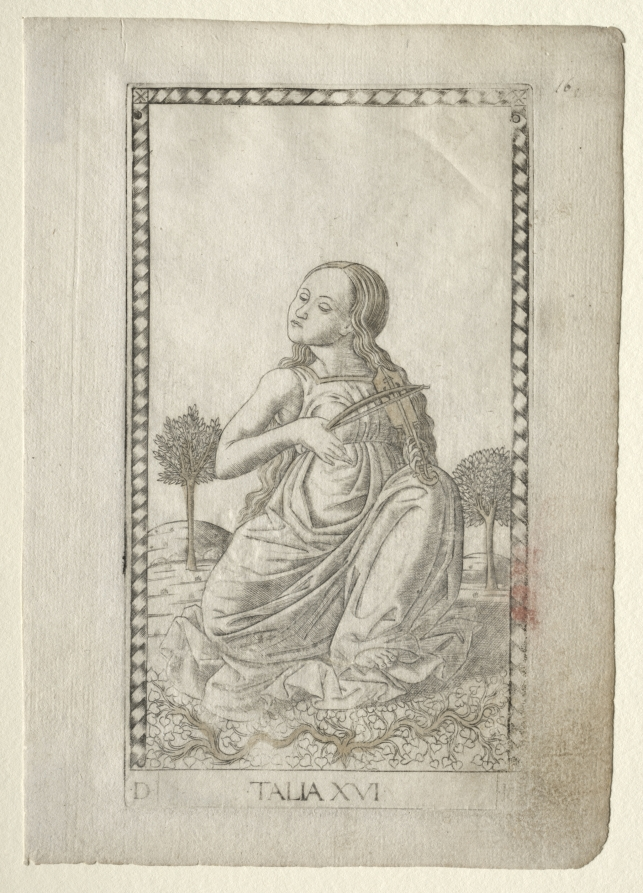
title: Thalia (comedy, pastoral poetry) (from the Tarocchi series D: Apollo and the Muses, #16)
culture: Italy, Ferrara, 15th century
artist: Master of the E-Series Tarocchi (Italian, active 1460s)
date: before 1467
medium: engraving hand-colored with gold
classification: Print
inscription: Lettered below the image of Talia (Thalia): ·D· / ·TALIA·XVI· / [16]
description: This engraving is part of the Tarocchi group marked with the letter “D,” and named Apollo and the Muses. In Greek mythology, the nine Muses (Calliope, Urania, Terpsichore, Erato, Polyhymnia, Thalia, Melpomene, Euterpe, and Clio) were the daughters of Zeus, king of the gods, and Mnemosyne, the Titaness of memory. The Muses were goddesses presiding over different branches of the arts and sciences. Their leader and supervisor was Apollo, the god of light, music, prophecy, and poetry. Here, Talia (Thalia) is personified as a female figure, in profile to left, seated on ivy, and set an imaginary landscape. She is playing a viola. Thalia was regarded as the Muse of comedy.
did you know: Thalia is the only Muse in the Tarocchi series that is not represented with a celestial disk. Indeed, Thalia was believed to be a bucolic Muse, thus related to earth.